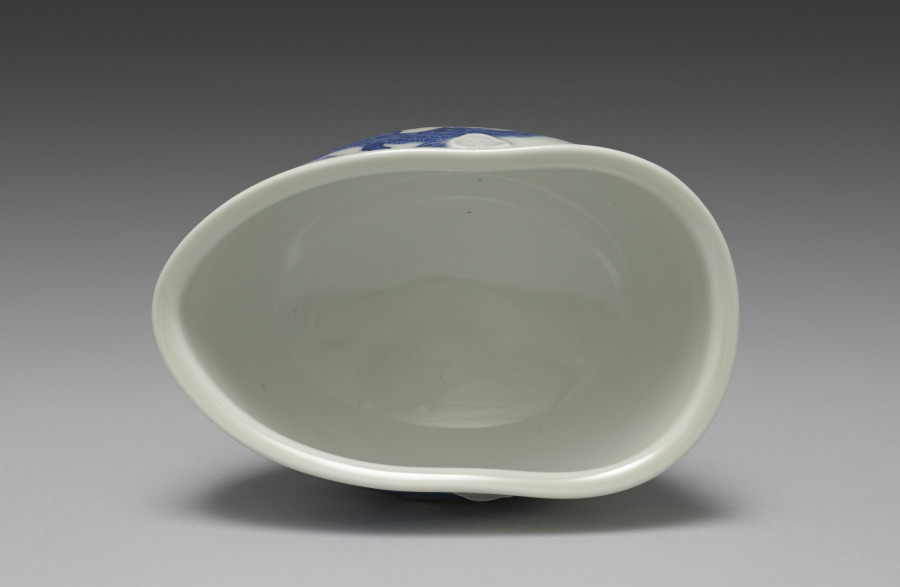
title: Water Cooler with Pines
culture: Japan, Meiji period (1868–1912)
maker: Seifū Yohei III (Japanese, 1851–1914)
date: 1893–1914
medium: Porcelain with underglaze blue and molded designs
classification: Ceramic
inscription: The center of the base contains an ovoid “Seifu” seal.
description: Hot water coolers, or yuzamashi, are essential components of sencha tea sets. Yuzamashi are used to cool boiled water to the ideal temperature for the type of tea to be brewed. The kidney-like shape of this one permits it to be cradled in one hand, following curvature of the palm, with the tips of the thumb and index finger each pressed against a nyoi staff-head-shaped applied form, perfectly placed to ensure a stable hold. Someone pinching the cooler in this way would have enough protection from the heat to maintain a steady grip but also sufficient contact along the base of thumb to assess the water temperature. On each of the cooler’s two longer sides, a pine tree in grass or sand is painted under the glaze in cobalt blue. The tree on one side has two main roots and two large branches, while that on the other has a single, thick, curved line from root to tip with racks of needles spreading across the width of the sky. A blue oval is traced along the footring, and the center of the base contains an ovoid “Seifu” seal.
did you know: Evergreen, pines have associations with eternal youth and longevity.